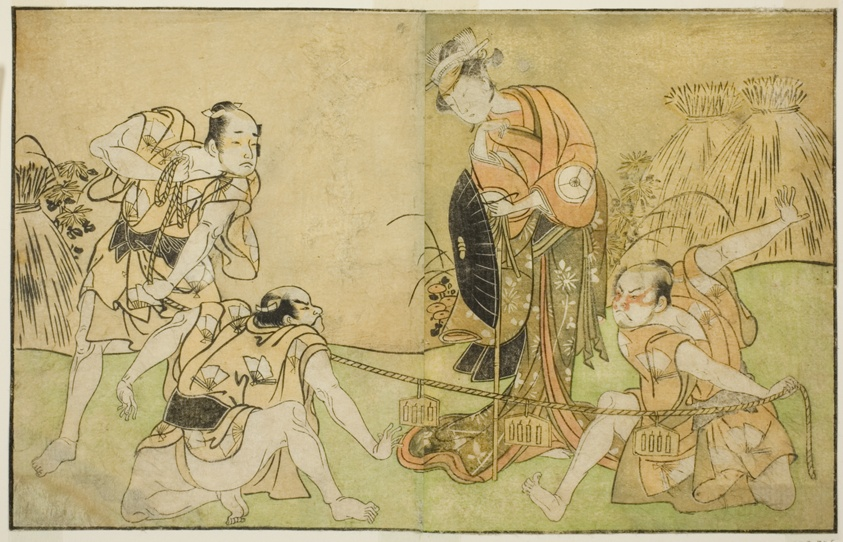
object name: Print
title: The Actors Bando Zenji I as Nagahashi Saburo, Iwai Hanshiro IV as Otatsu-gitsune, Nakamura Konozo as Hagai Ujitsune, and an Unidentified Actor (right to left), in the Play Nue no Mori Ichiyo no Mato, Performed at the Nakamura Theater in the Eleventh Month, 1770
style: Japanese (culture or style)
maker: Katsukawa Shunsho 勝川 春章; Japanese, 1726-1792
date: c. 1772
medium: Color woodblock print; from the illustrated book Yakusha Kuni no Hana (Prominent Actors of Japan)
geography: Japan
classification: woodblock print; print; asian art